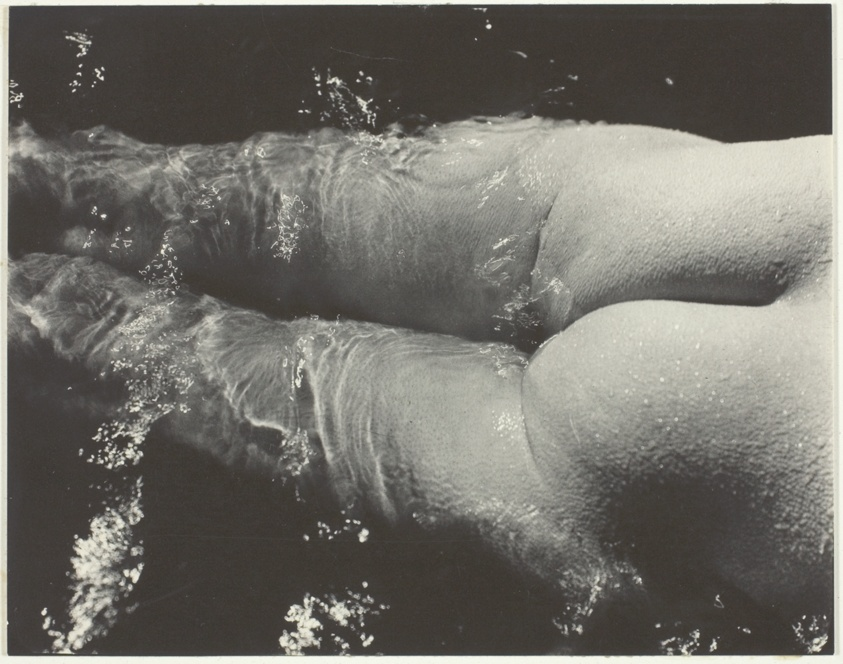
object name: Photograph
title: Rebecca Salsbury Strand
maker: Alfred Stieglitz (American, 1864–1946)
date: 1922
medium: Gelatin silver print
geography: United States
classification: gelatin silver (developing-out-paper) pr; photographic process; photography; photograph